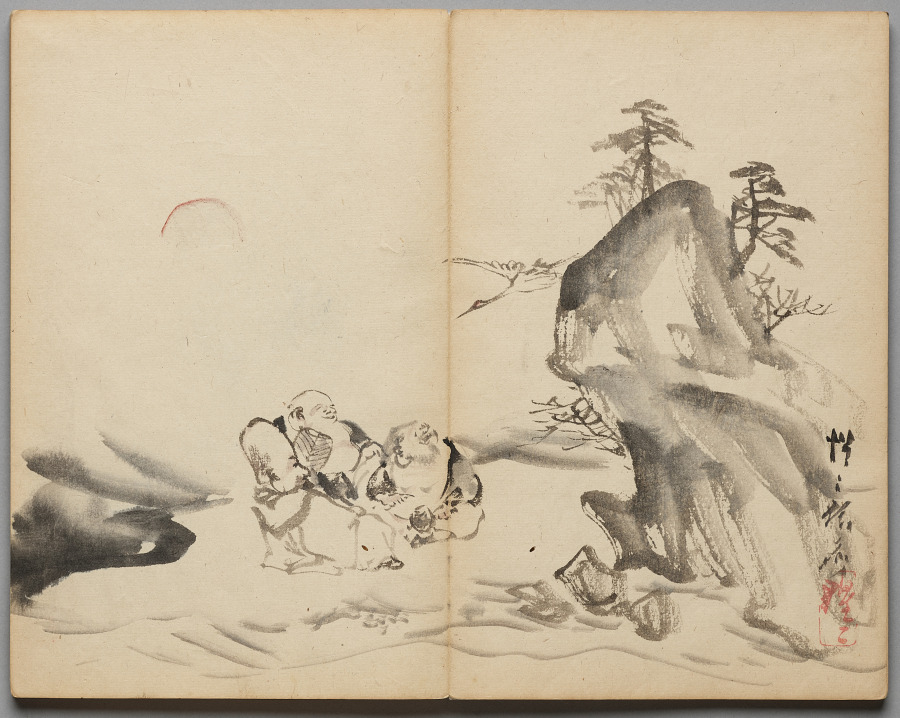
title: Gods of Fortune at Mt. Penglai from Sketch Album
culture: Japan, Edo period (1615–1868) to Meiji period (1868–1912)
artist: Kawanabe Kyōsai (Japanese, 1831–1889)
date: mid- to late 1800s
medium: Accordion-style book of 26 double-leaves; ink and color on paper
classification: Bound Volume